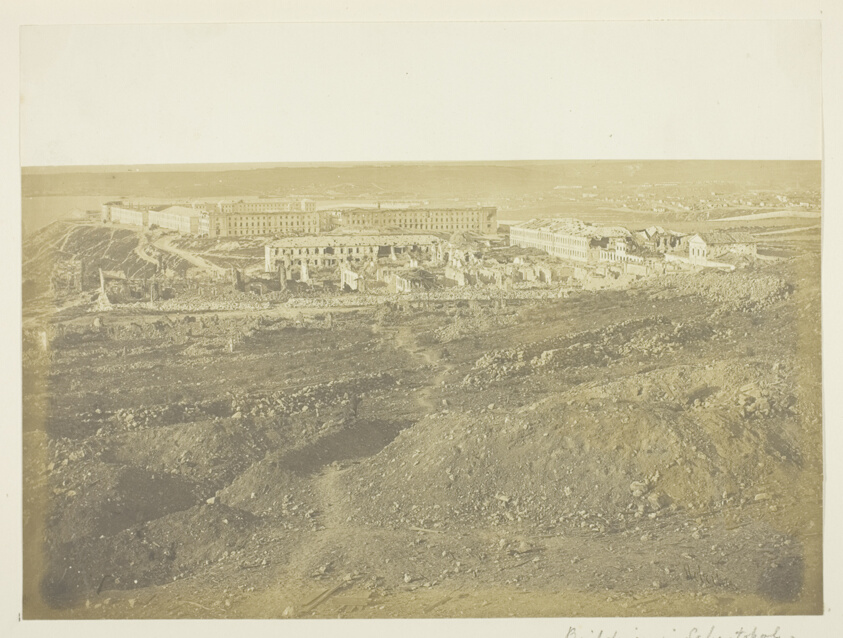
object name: Photograph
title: Buildings in Sebastopol, View Taken from the Redan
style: 19th century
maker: James Robertson (Scottish, c. 1813–d. after 1881)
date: 1855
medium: Albumen print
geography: Scotland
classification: unidentified; photography; photograph